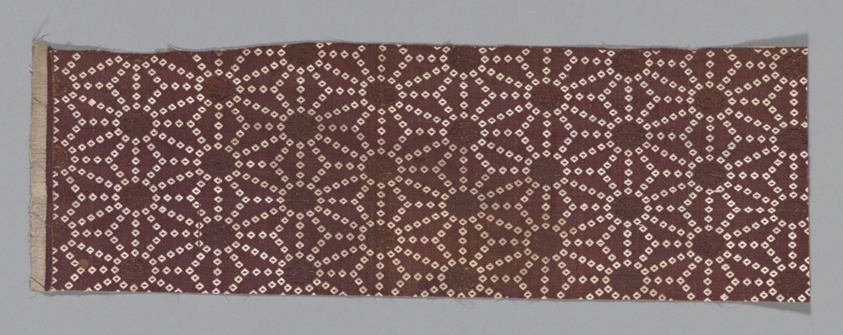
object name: Textile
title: Fragment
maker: Japan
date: Edo period (1615–1868), 1775/1825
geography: Japan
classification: textile; weaving